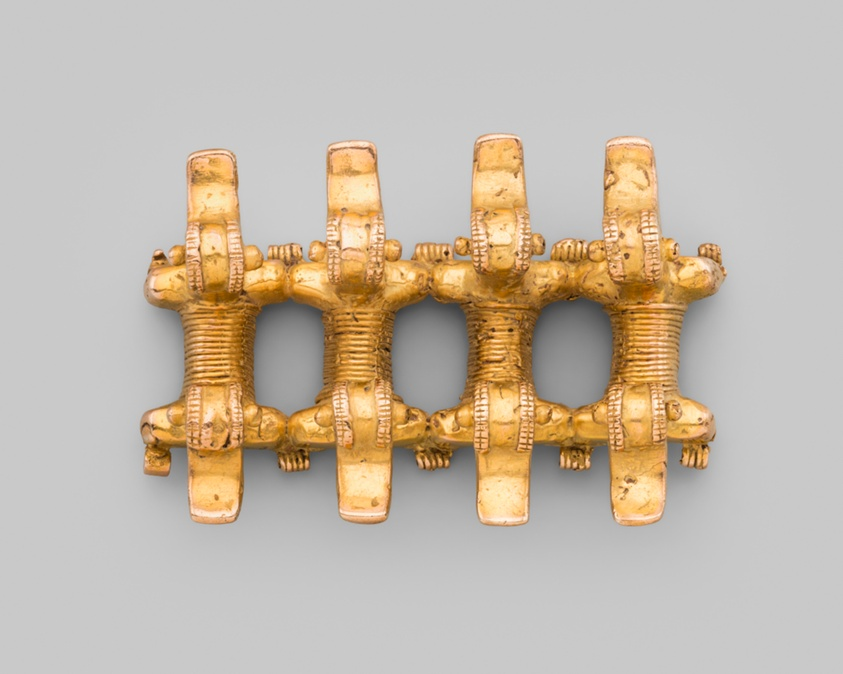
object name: Costume and Accessories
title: Pendant in the Form of Four Double-Headed Figures with Long Beaks, Possibly Ducks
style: coclé, Pre-Columbian, americas, Arts of the Americas, lower central america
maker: Coclé (Venado Beach, Coclé province, Panama)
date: 500–1000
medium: Cast gold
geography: Panama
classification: pendant (jewelry); metal; jewelry; art of the americas; costume